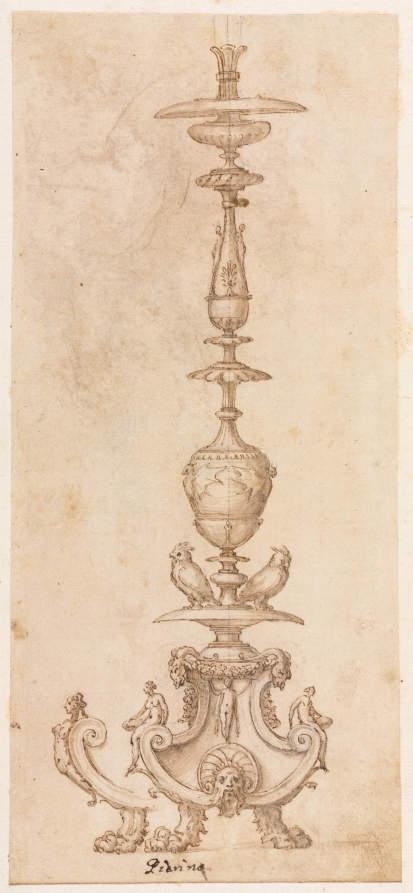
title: Design for a Candlestick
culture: Italy, 16th century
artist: Luzio Romano (Italian, active 1528–75)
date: mid 1500s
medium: pen and brown ink and brush and brown wash, over black chalk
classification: Drawing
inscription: lower center, in brown ink: Pierino ; RECTO OF SECONDARY SUPPORT, lower right, in graphite: 20 ; lower right, in graphite(?): [erased, sideways] ; VERSO OF SECONDARY SUPPORT, lower right, in graphite: A 3107